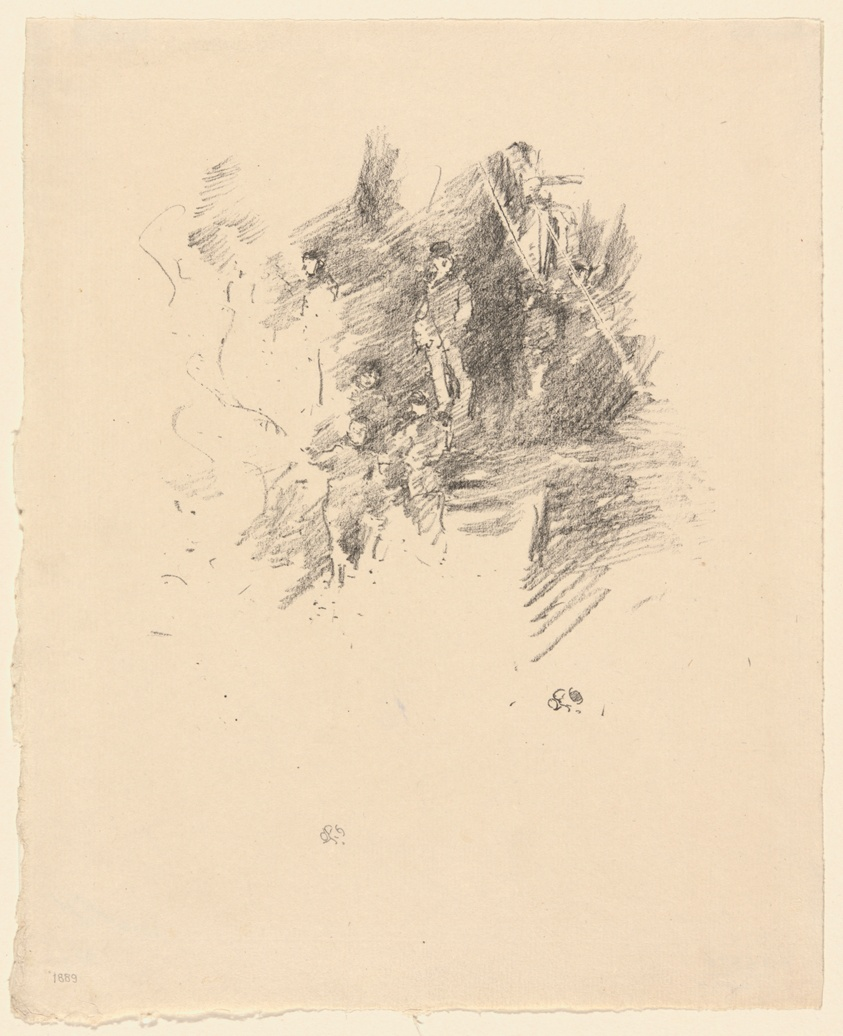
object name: Print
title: Fifth of November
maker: James McNeill Whistler (American, 1834-1903)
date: 1895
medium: Transfer lithograph in black on cream laid paper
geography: United States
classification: transfer lithograph; lithograph; print; prints and drawing; paper